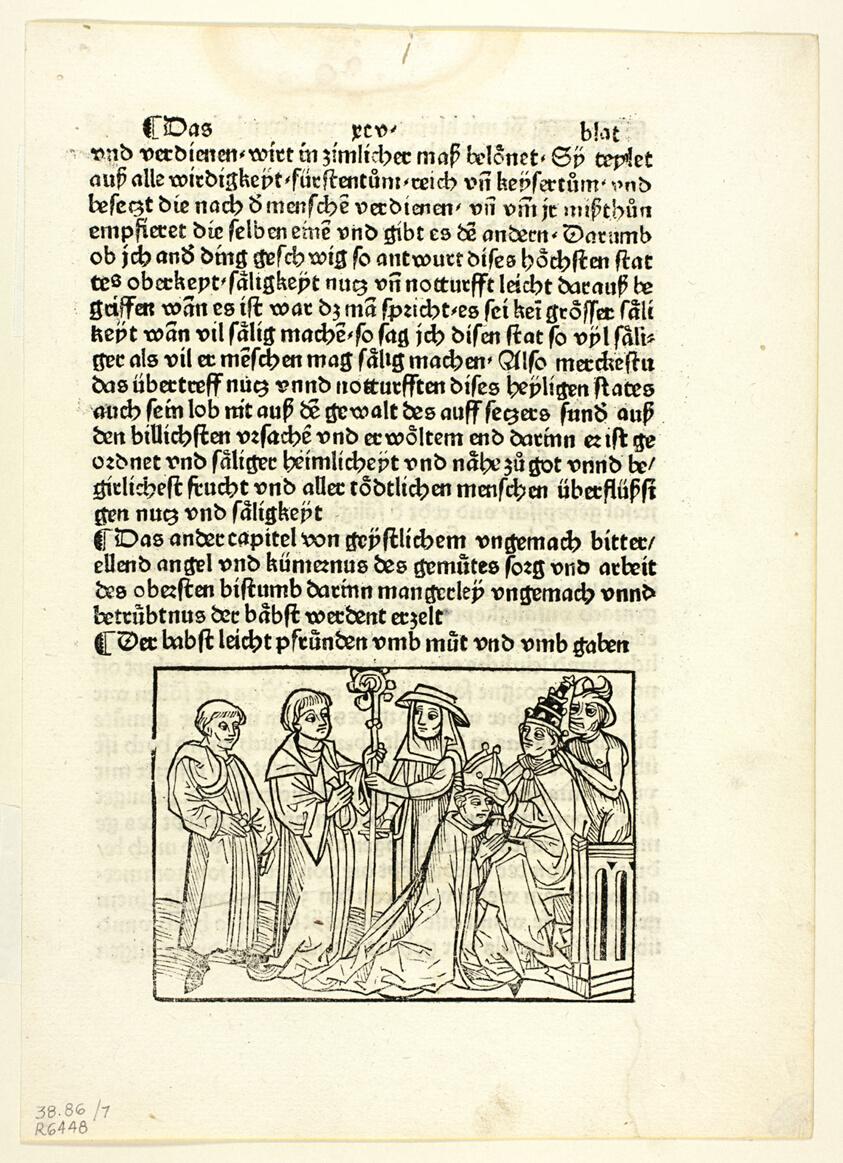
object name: Print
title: A Pope Installing a Bishop from Speculu humane vite (Mirror of Human Life), Plate 7 from Woodcuts from Books of the 15th Century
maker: Unknown Artist (Augsburg, 15th century); printed and published by Peter Berger (German, active 1486–1489); original text by Rodericus Zamorensis (Spanish, 1404–1470); portfolio text by Wilhelm Ludwig Schreiber (German, 1855–1932)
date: 1488, portfolio assembled 1929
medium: Woodcut and letterpress in black (recto and verso) on cream laid paper, tipped onto cream wove paper mat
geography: Germany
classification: woodcut; print; prints and drawing